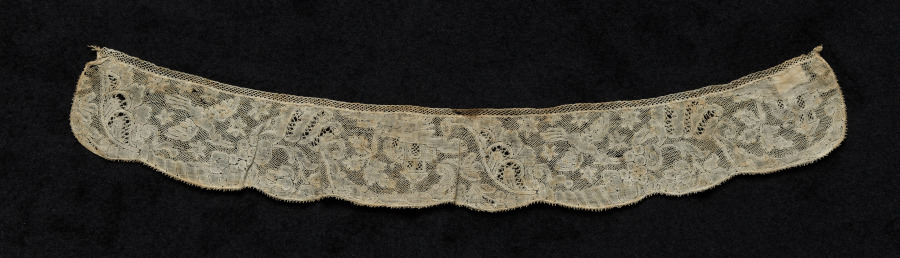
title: Lace Edging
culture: Belgium, Mechelen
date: 1700s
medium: Linen: bobbin lace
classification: Lace